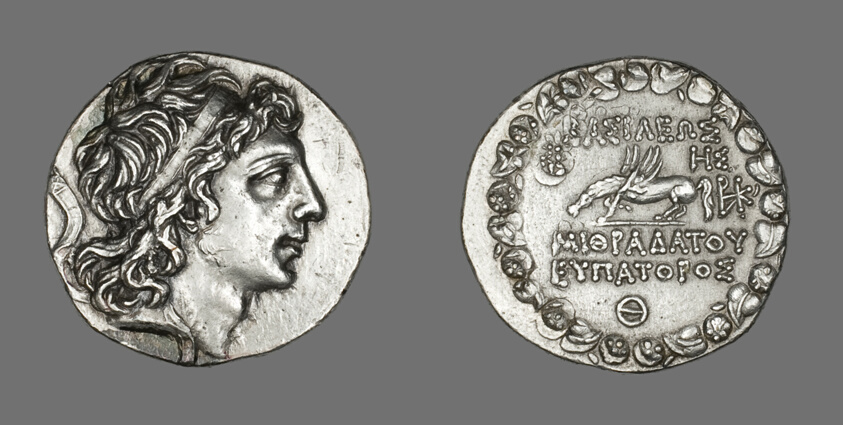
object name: Coin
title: Tetradrachm (Coin) Portraying King Mithridates VI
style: republic period, ancient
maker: Greek; Kingdom of Pontus (now northern Turkey)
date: 90-89 BCE, reign of Mithradates VI of Pontus and Bithynia (120–63 BCE)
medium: Silver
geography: Greece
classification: coin; ancient art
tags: portraits, writing